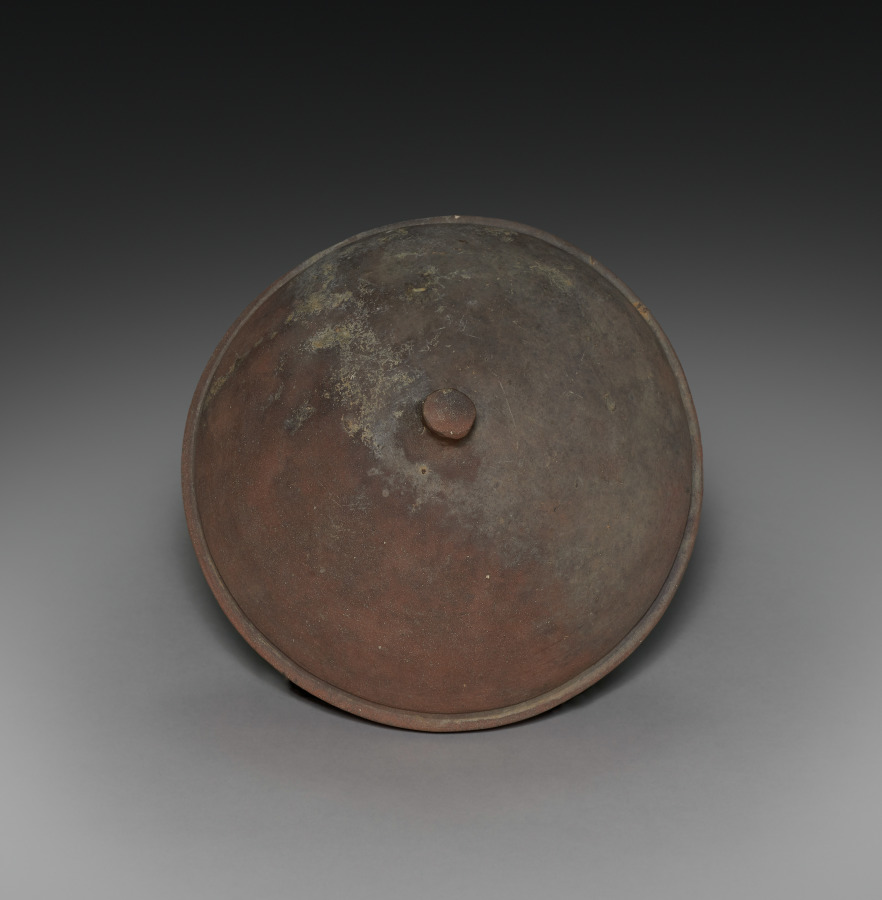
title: Vessel with Knobbed Lid (lid)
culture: Korea, Gaya period (42–562 CE)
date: 200s–300s CE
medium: stoneware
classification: Ceramic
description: This storage vessel is distinguished by its robust, subtly proportioned form and its body color. The purplish-brown surface "skin" is enlivened by a series of smoky black swirling marks that occurred during the firing in the wood kiln. This shape began as a series of clay coils that were pinched and then paddled; however, it spent more time on a potter's wheel to thin and finish its outer surface. The lid received similar, understated attention to detailing and finish.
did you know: This type of lidded vessel served to contain cremated remains, indicating the popularity of Buddhist mortuary practice in Korea during the Three Kingdoms period.